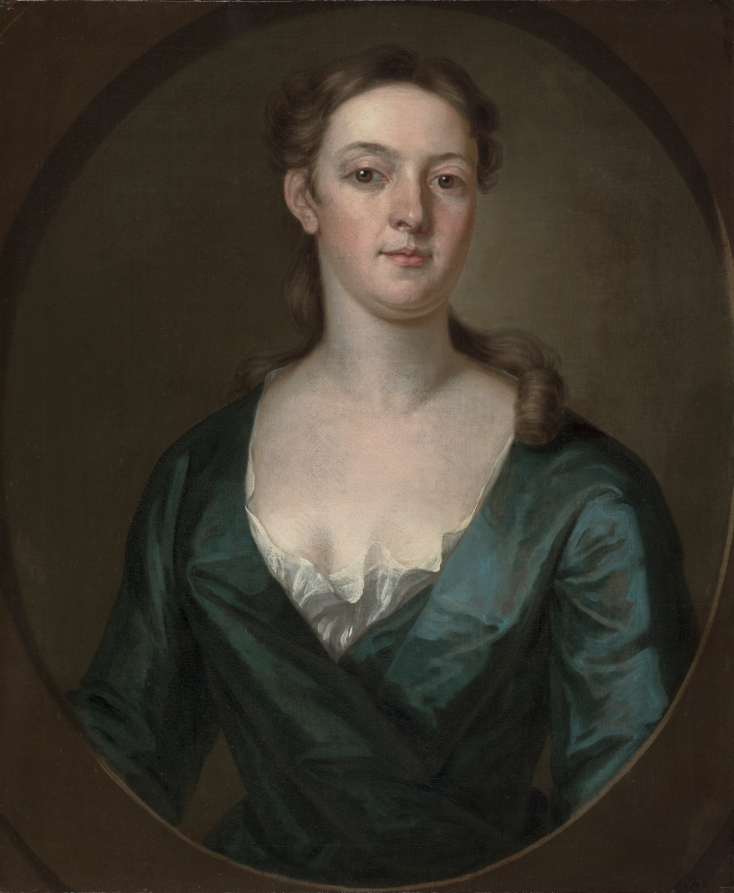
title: Portrait of a Woman (Judith Colman Bulfinch?)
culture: America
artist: John Smibert (Scottish, 1688–1751)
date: c. 1734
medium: oil on canvas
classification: Painting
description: The appearance of a professionally trained British painter in the American colonies in 1729 marks a curcial point in the history of American art. Smibert not only imported the skills necessary to convey the impression of substantial, rounded forms in a picture, but his commercial success also inspired others to contemplate careers as painters. Born in Edinburgh and schooled in London and Italy, Smibert attracted numerous clients upon his arrival in Boston. The low bodice, long neck, and sinuous curl of hair in this portrait follow British conventions for depicting women. Research continues as to the identity of the sitter, long thought to be Mrs. Thomas Bulfinch (born Judith Colman, 1707-1765), since that name does not appear in Smibert's recently discovered records.